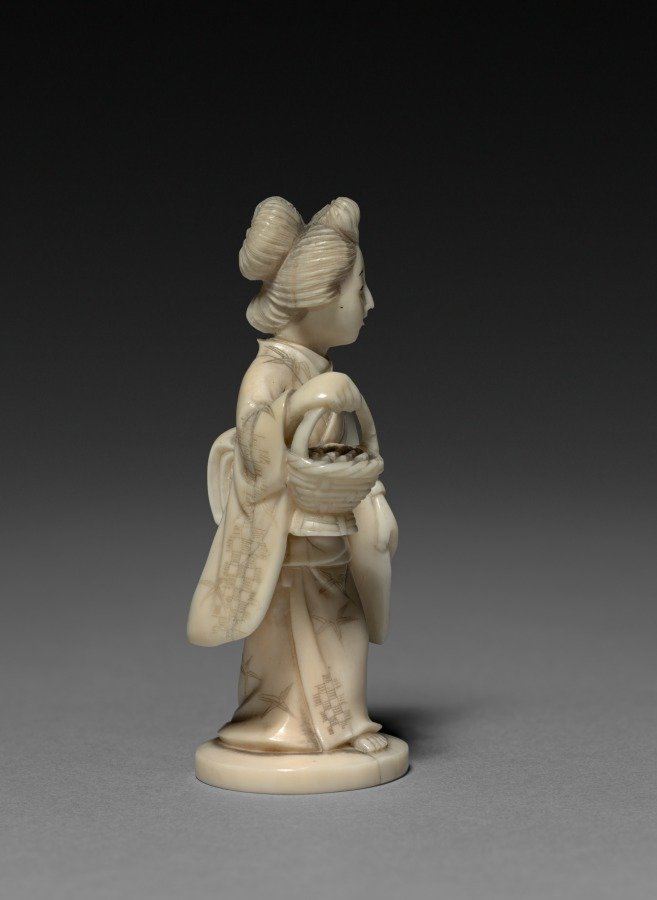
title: Woman Carrying a Basket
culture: Japan, Meiji period (1868–1912)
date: early 1900s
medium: ivory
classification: Ivory